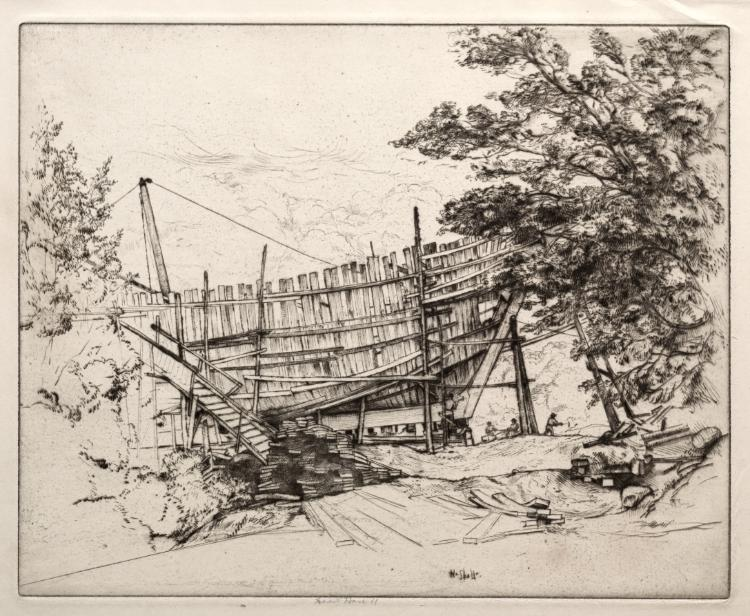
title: Shipbuilding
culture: America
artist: Ernest Haskell (American, 1876–1925)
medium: etching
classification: Print